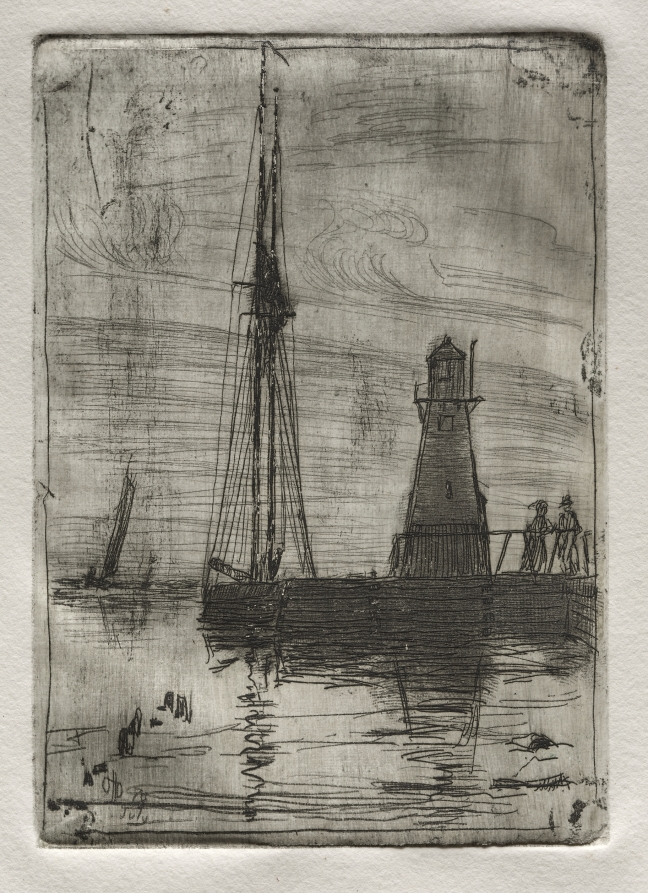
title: River Pier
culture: America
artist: Otto H. Bacher (American, 1856–1909)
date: 1878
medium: etching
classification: Print